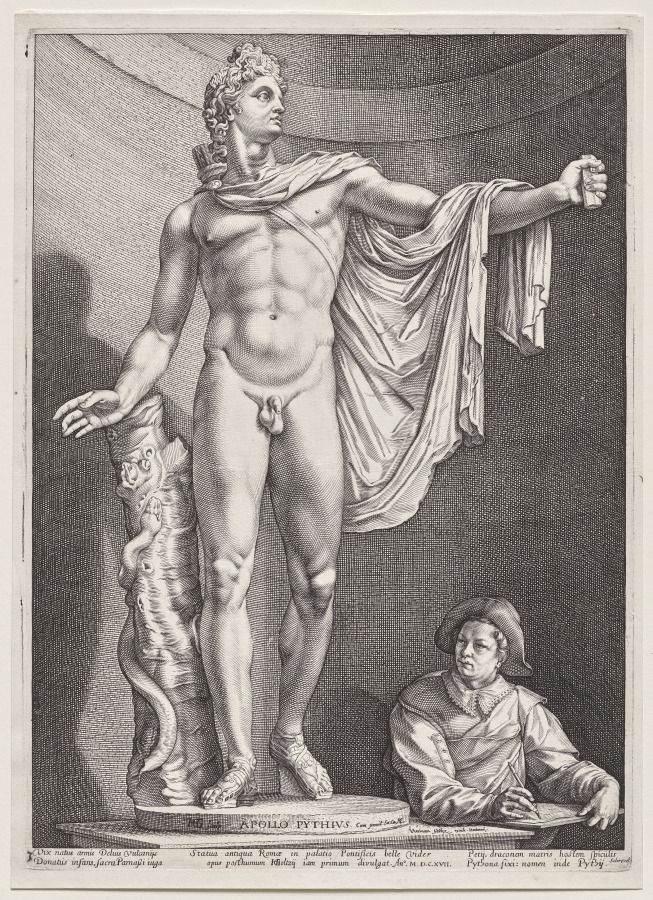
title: Apollo Belvedere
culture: Netherlands, 16th century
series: Three Famous Antique Roman Statues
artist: Hendrick Goltzius (Dutch, 1558–1617)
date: 1592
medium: engraving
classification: Print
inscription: watermark: Strasbourg Lily and pendant letters WR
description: Hendrick Goltzius was one of many late Renaissance artists who felt compelled to travel to Italy as part of his artistic training. He went with one purpose—to study antique sculpture. Goltzius made drawings on-site and then made engravings after his designs once he returned to Haarlem in 1591. He portrayed the Apollo Belvedere from a low viewpoint to capture the awesome experience of first encountering the famous monument. A seated, sketching artist emphasizes the experience of visiting, seeing, and drawing the sculpture in situ. The engraving shows to excellent advantage the virtuosic technique that Goltzius developed, in which the swelling and tapering line exaggerates the heroic musculature of the figure.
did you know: The 2nd-century Apollo Belvedere was unearthed in central Italy during the Renaissance and was on display at the Vatican Palace by the time Hendrick Goltzius visited the city.